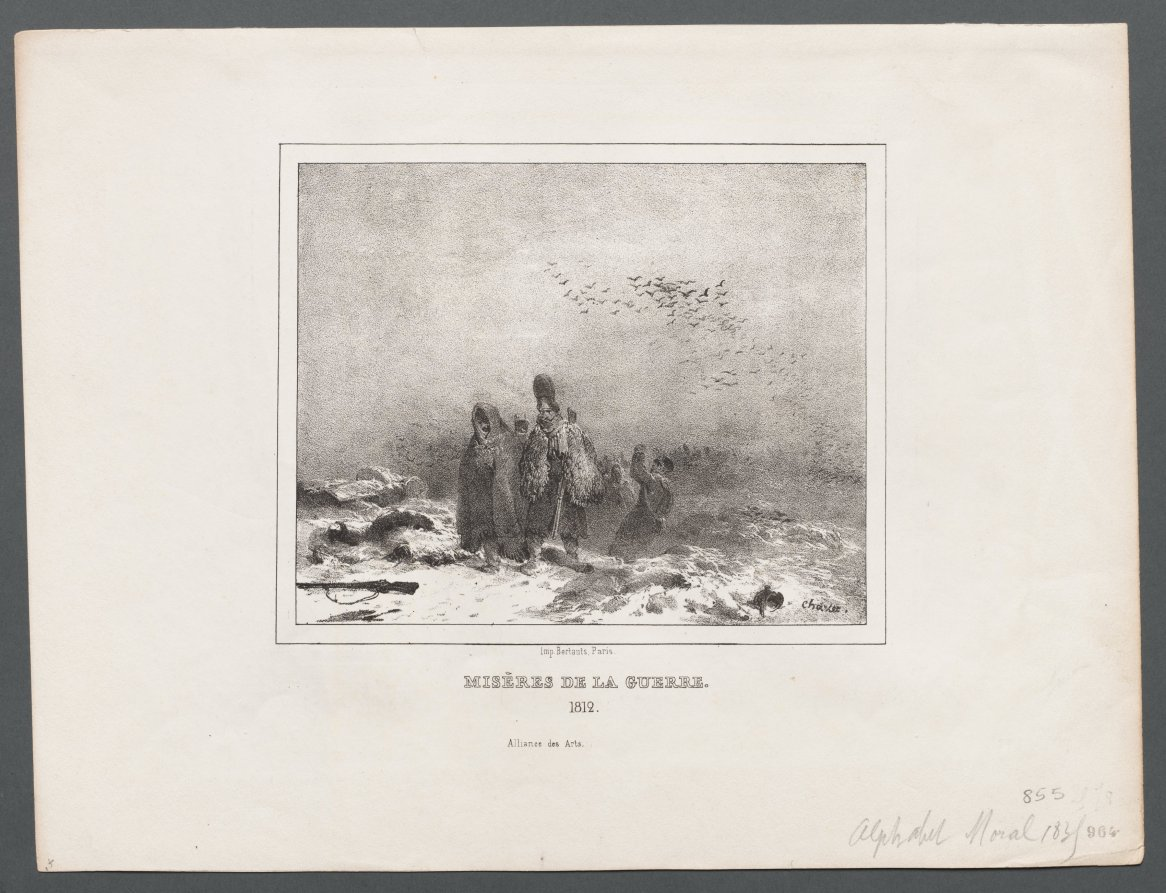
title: Moral and Philosophical Alphabet for the Use of Little and Big Children: Miseries of War (1812)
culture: France, 19th century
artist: Nicolas Toussaint Charlet (French, 1792–1845)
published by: Bertaut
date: 1812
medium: lithograph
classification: Print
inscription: in pencil, lower right: "855" / "Alphabet Moral 1835"